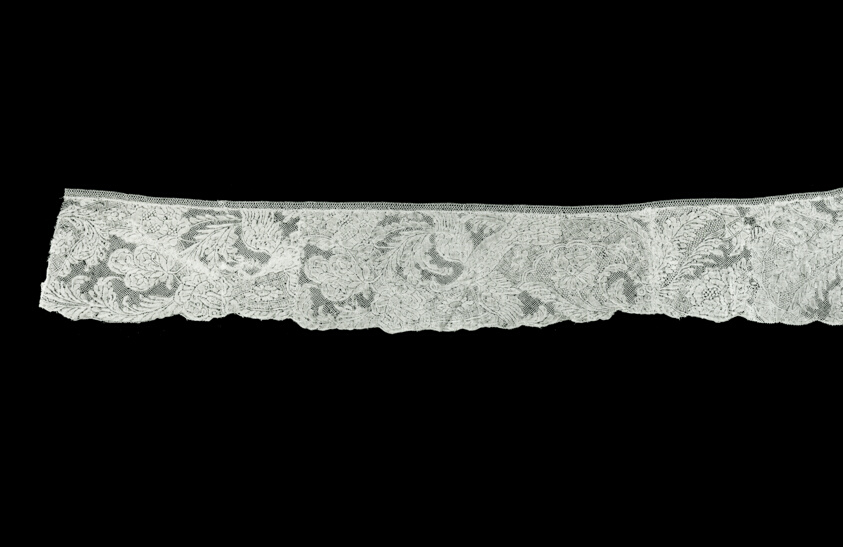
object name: Costume and Accessories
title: Border (From Lappet)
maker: France, Valenciennes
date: 1720s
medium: Linen, bobbin straight lace of a type known as "Valenciennes" with a five hole mesh ground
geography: Valenciennes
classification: costume accessory; lace - bobbin; textile; costume; costume accessory - headdress; costume accessory worn above the waist